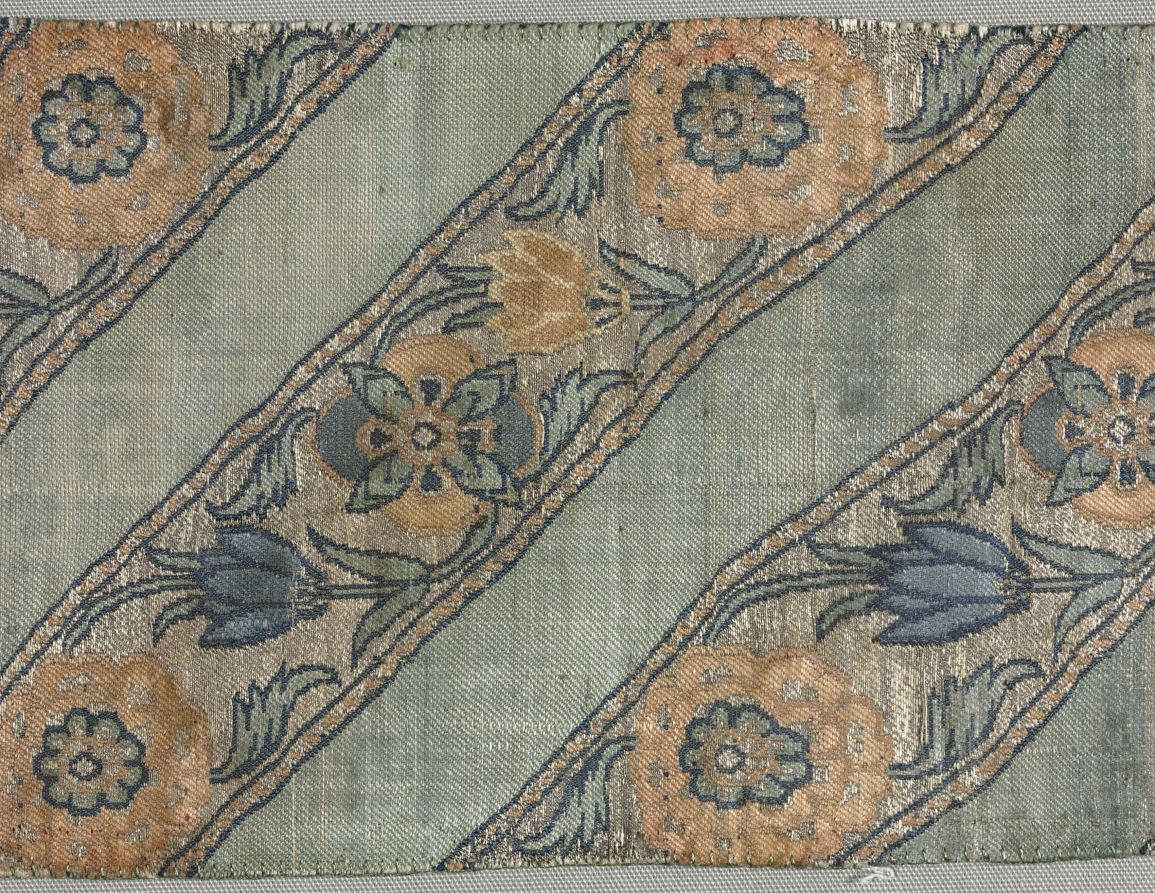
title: Fragment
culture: Iran, 17th century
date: 1600s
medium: brocade; silk and metal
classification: Textile